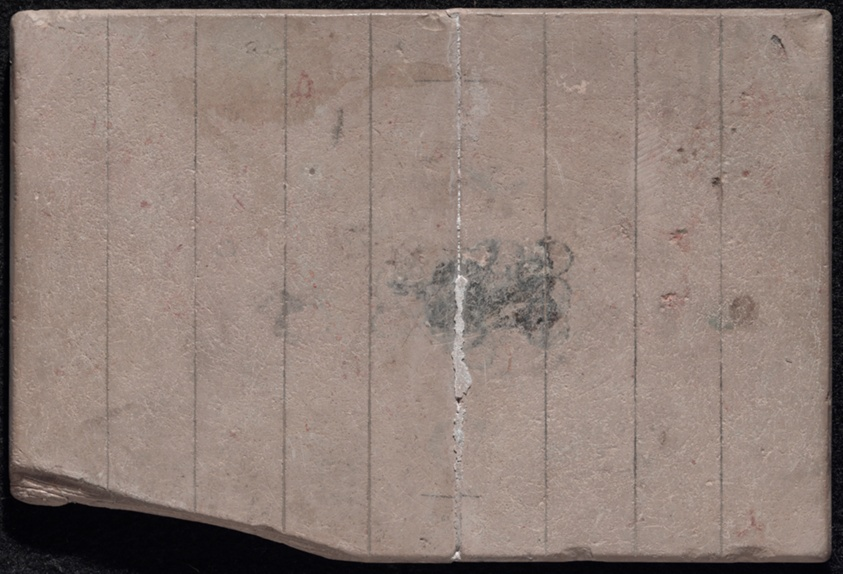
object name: Architectural fragment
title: Plaque Depicting a Ram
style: ptolemaic, greco-roman (egyptian), ancient, egyptian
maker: Egyptian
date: Ptolemaic Period (332–30 BCE)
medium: Limestone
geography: Egypt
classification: plaque (flat object); stone; sculpture; ancient art; votive offering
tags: ram, animals